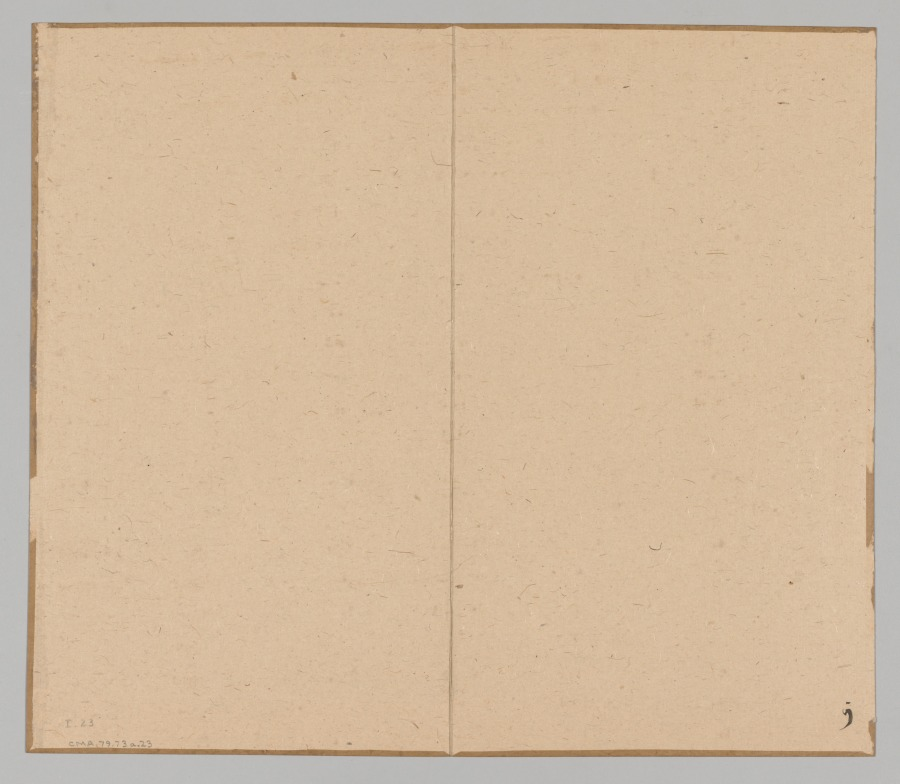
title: Reverberations of Taiga, Volume 1 (leaf 23)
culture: Japan, Edo period (1615–1868)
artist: Aoki Shukuya (Japanese, d. 1802)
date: mid-1700s–1802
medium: double-leaf from a pair of albums; ink and light color on paper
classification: Portfolio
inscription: 郭法礬石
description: Aoki Shukuya was a top student of painter Ike Taiga and took responsibility for Taiga’s stylistic legacy. A painting album by Taiga, part of which survives today in Kyoto in hanging scroll format, served as the source for this painting by Shukuya and the matching designs from a set of wood-block–printed volumes published in 1804. The postscript to the books, written and carved by the scholar Minagawa Kien (皆川淇園) (1735–1807), explains that Taiga produced the original album for his wife and fellow painter Tokuyama Gyokuran (徳山玉瀾) (1727/28–1784). Complex rock formations are accompanied by the text “Guo’s method for alunite” (郭法礬石) in a design from the second volume of the wood-block–printed set and Shukuya’s painting. This is a reference to the Northern Song–dynasty (960–1127) painter Guo Xi (郭熙) (Chinese, about 1020–1090) and a pale, often whitish mineral that forms naturally when volcanic rocks are altered by hot, acidic water.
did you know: Traditionally, young painters in Japan began their studies with an established master painter. The master's compositions invariably became models that the apprentice copied to learn various ink and brush techniques.